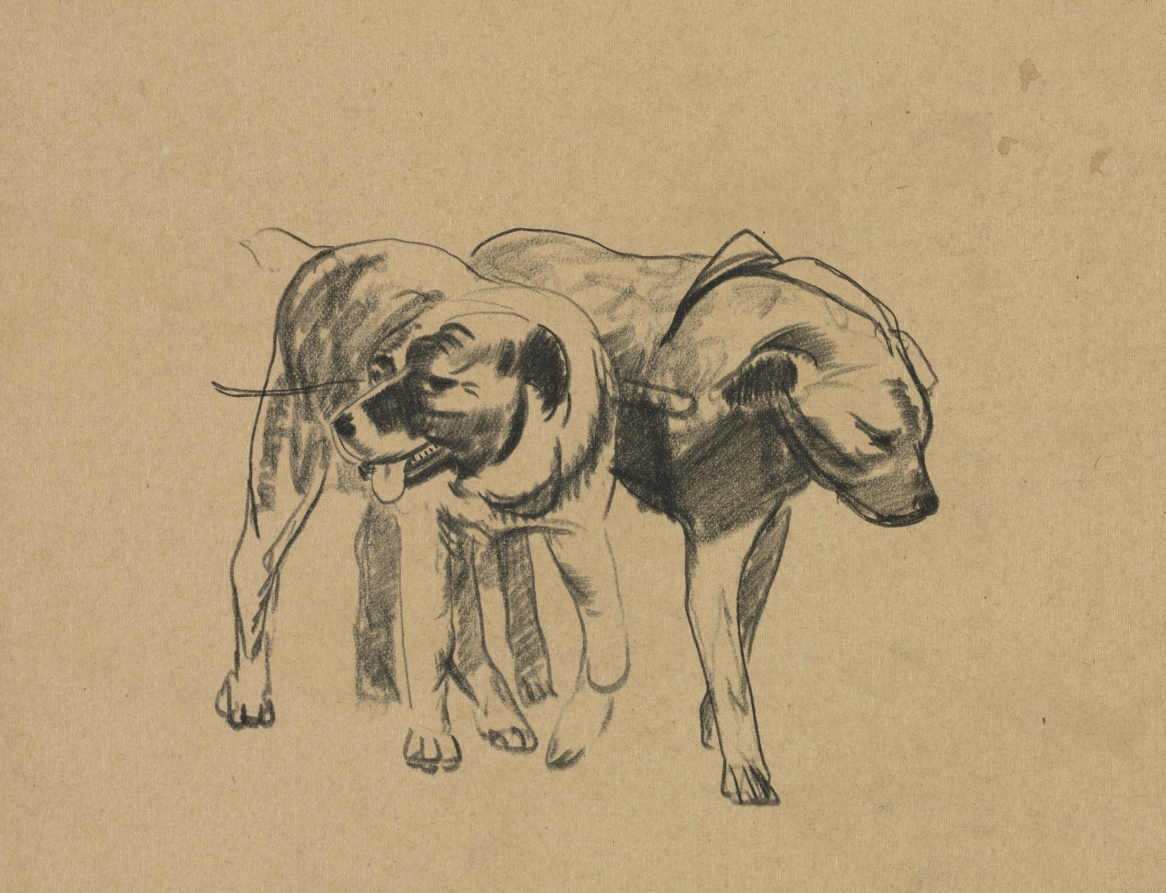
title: Two Dogs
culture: America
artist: George Bellows (American, 1882–1925)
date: c. 1900–1923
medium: conté crayon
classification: Drawing